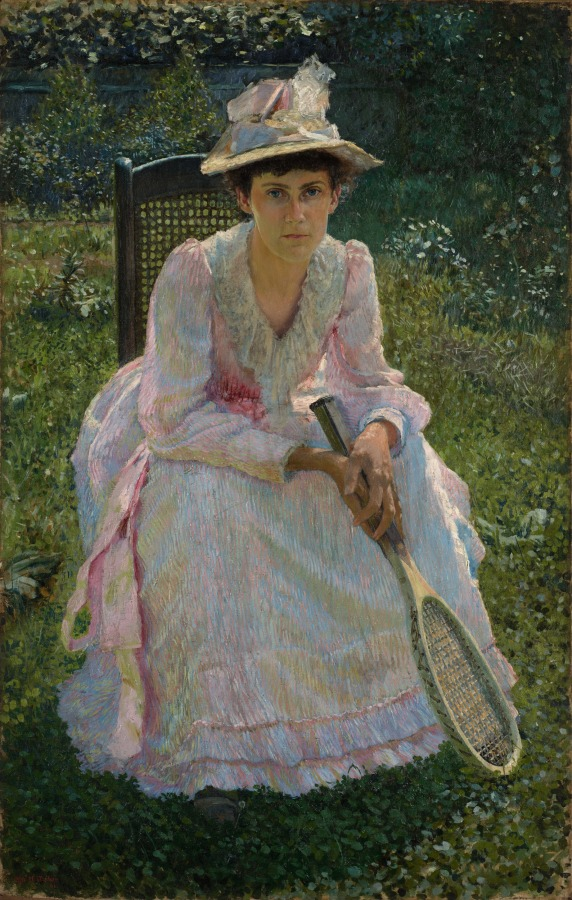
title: Mary Holland Bacher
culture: America, Ohio, Cleveland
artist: Otto H. Bacher (American, 1856–1909)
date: 1891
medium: oil on canvas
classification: Painting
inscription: signed lower left: Otto H. Bacher. / --91.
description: Bacher was the first artist from Cleveland to achieve international renown, and this portrait of his wife exemplifies the Impressionist style he adopted after studying in Paris during the late 1880s. The painting’s unusual subject testifies to the emergence of tennis as one of the few sports of the era in which women could participate without being considered inappropriately masculine or uncouth.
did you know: As a child, Otto Bacher liked to sketch shipping activities around Cleveland's port.